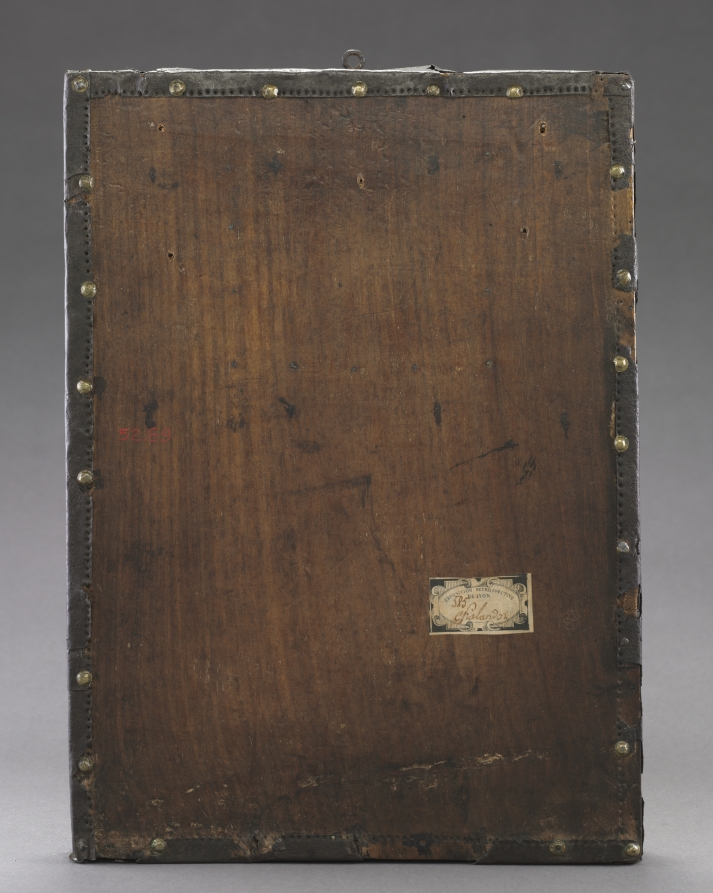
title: Reliquary of the True Cross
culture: Cross: Latin Kingdom of Jerusalem Panel: Rhine-Meuse region, Gothic period, 13th century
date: c. 1214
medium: silver, gilded silver, niello, precious stones, walnut core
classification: Metalwork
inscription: the Latin inscription on the border of the cover, written in gothic characters, translates as follows: "If you want information about the cross, read this: A priest, a true descendant of Judas, stole the relic and boarded a ship. Instead of the fair breeze he was wishing for, the aggrieved sailors ran into a tempest. The priest became raving mad to the point of gnawing his own hands. The Virgin Mary appeared to him and said: 'You will immediately recover your wits if you undertake to give back what you robbed.' He thereupon bequeathed the relic to the Knights Templars and agonized, brooding on himself: 'As long as I breathe, the waves will form horrible whirlpools. If I am thrown into the sea, it will quiet down.' He gave up the ghost and was thrown overboard. The pilgrims happily disembarked at Brindisi and returned peacefully to their country with the relic of the cross which you see beautifully set in its container. The panel-shaped reliquary was made in the year of the incarnation 1214 in the month of February." On front, Latin inscriptions listing the relics run between the inner and outer lines of the ovals and inside the two roundels not circumscribed by an oval.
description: A lengthy Latin inscription on the frame recounts the history of the central relic--a fragment of the True Cross--and provides an exact date for its container: "You who ask about the cross: read! The heir of Judas the priest/Stole it. But when, after boarding a ship,/He sought a mild breeze, a fierce storm opposed the sorry sailors./Out of his mind, he gnawed at his own hands./In the end the blessed Virgin spoke thus to him:/‘You shall soon be well, if you seek to return what was stolen.’/ He pays back this debt to the brothers of the Temple . . . When he died, they cast him overboard, and the storm subsided./Happy they arrive at Brindisi, quiet they have returned with the cross,/Which resides beautiful in this handsome panel. This tablet was created in the 1214th year from the Lord’s incarnation in the month of February."